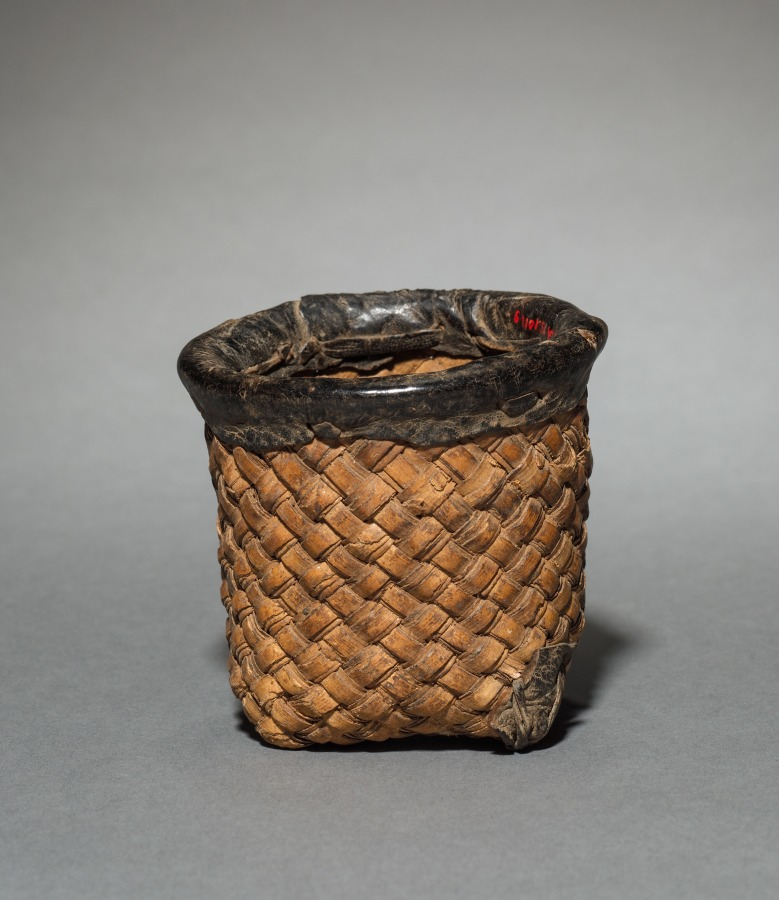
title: One of Ten Nesting Wedding Baskets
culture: Africa, Western Africa, Burkina Faso, Lobi–style maker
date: c 1900s?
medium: Plant fiber and leather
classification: Vessels